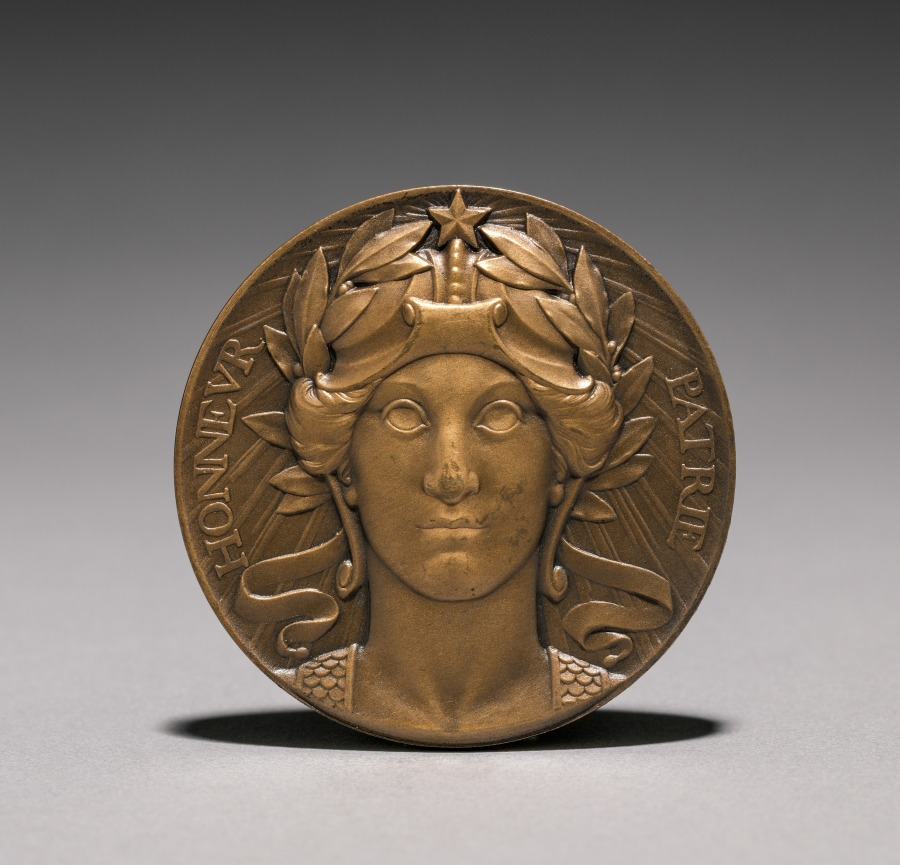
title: Medal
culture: France, 20th century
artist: Auguste Dujardin (French, 1847–1918)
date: 1914–1916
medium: bronze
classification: Metalwork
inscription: "Honneur Patrie."